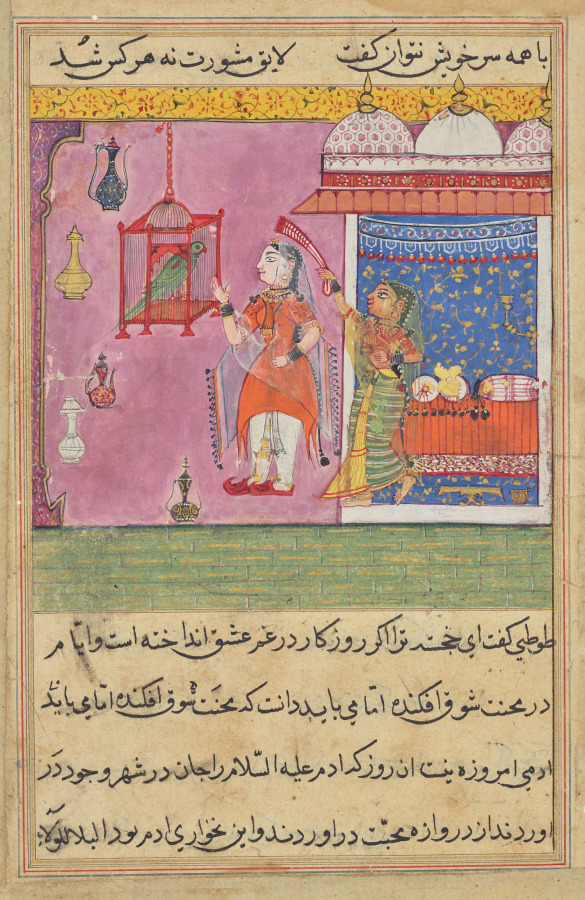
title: The Parrot Addresses Khujasta at the Beginning of the Nineteenth Night, from a Tuti-nama (Tales of a Parrot)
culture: Mughal India, court of Akbar (reigned 1556–1605)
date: c. 1560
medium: gum tempera, ink, and gold on paper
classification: Painting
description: Tuti the parrot begins to tell Khujasta a story about the importance of keeping secrets. The green and gold tiled floor, mauve background, and arabesque, yellow band are vestiges of an earlier paining tradition.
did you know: Khujasta’s attendant whisks flies away with a strip of cloth.